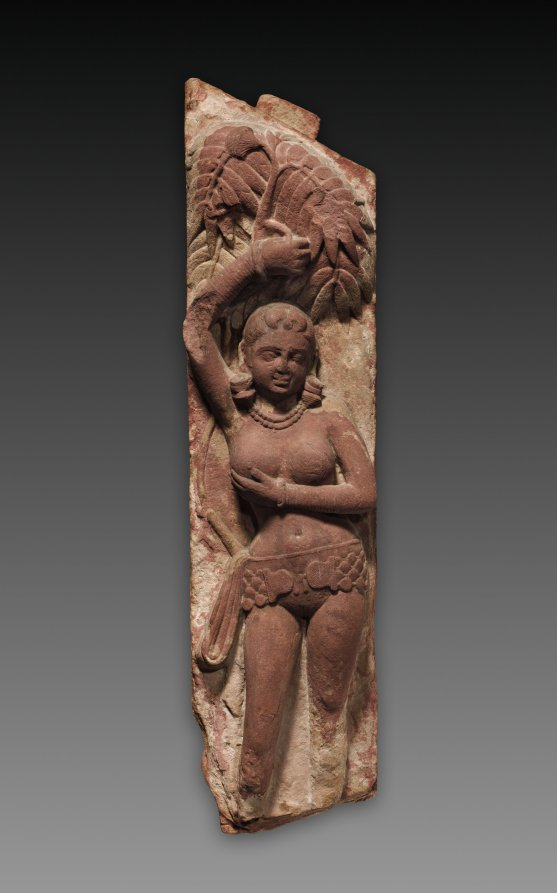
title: Railing Pillar with a Yakshi (Female Nature Divinity)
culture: Northern India, Mathura, Kushan period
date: c. 125–50 CE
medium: red sandstone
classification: Sculpture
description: This pillar would have been an upright of a stair banister, probably leading to an upper circumambulatory path of a Buddhist or Jain sacred monument known as a stupa. It has the image of a nature divinity grasping the branch of an ashoka tree with one hand and touching her breast full of nourishing milk with the other. The reverse side of the pillar is decorated with a stupa at the top and a partially damaged scene set in the architectural framework below.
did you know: Flowers of the ashoka tree (saraca asoca) are bright red.